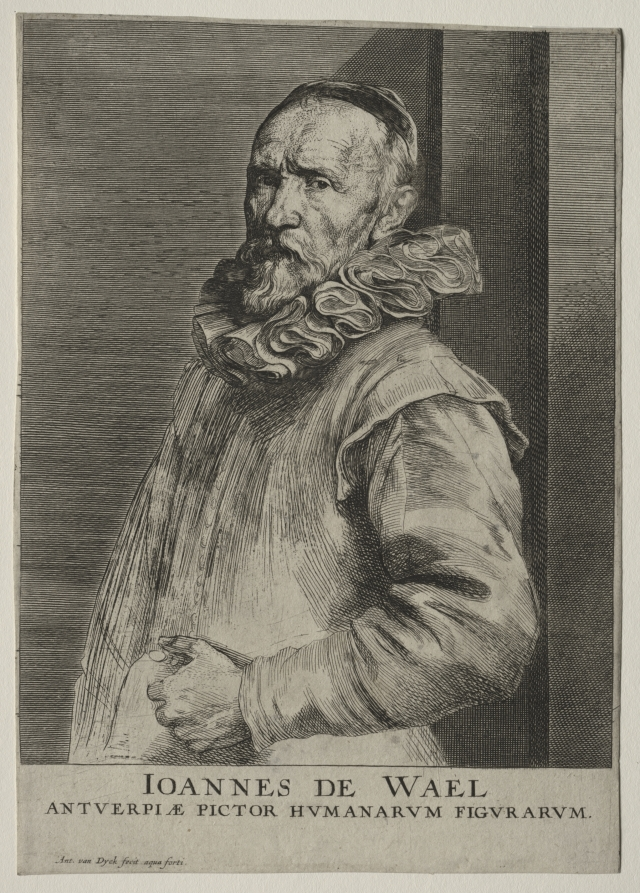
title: Jan de Wael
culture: Flanders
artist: Anthony van Dyck (Flemish, 1599–1641)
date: 1630–33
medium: engraving and etching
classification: Print